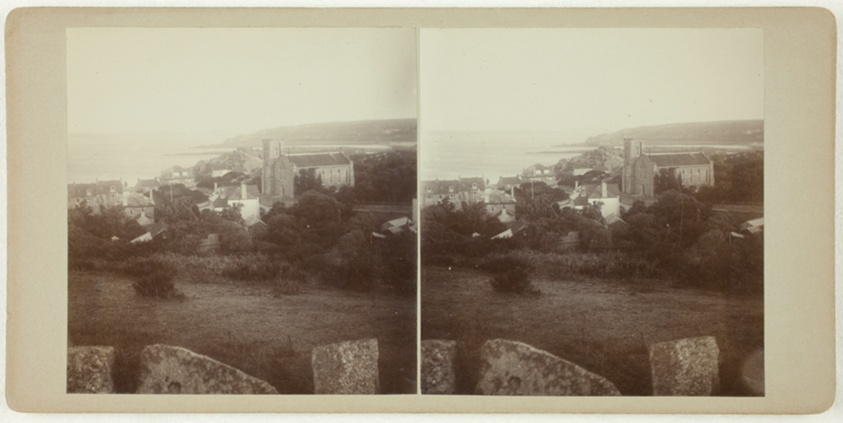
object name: Photograph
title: Untitled (St. Mary's, Scilly, Hugh Town)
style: 19th century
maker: Artist unknown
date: 1860s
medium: Albumen print, stereo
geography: Isles of Scilly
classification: photograph; albumen silver print; photography